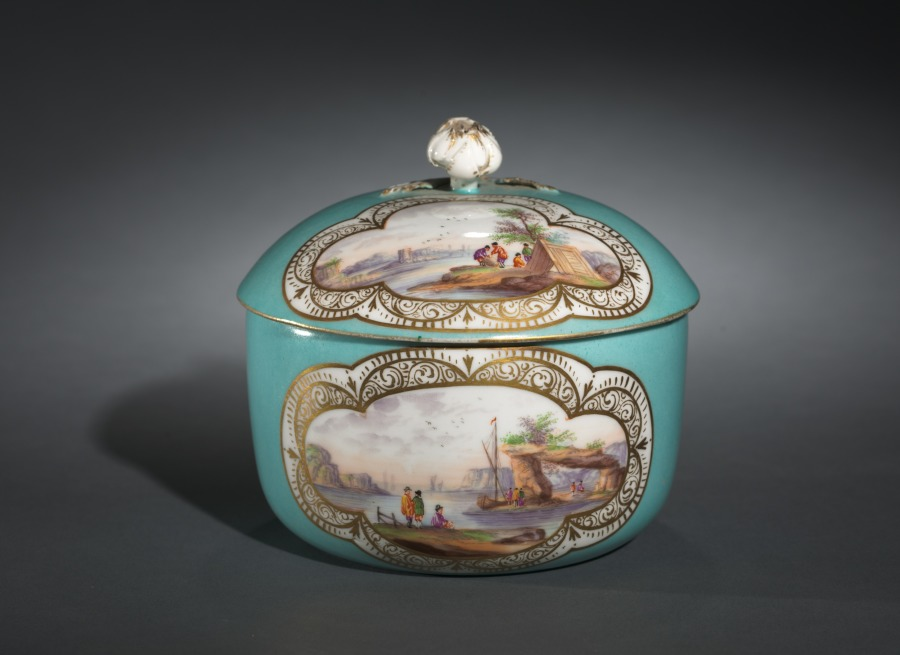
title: Sugar Bowl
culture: Germany, Meissen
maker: Meissen Porcelain Factory (German, est. c. 1710)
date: c. 1750–70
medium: porcelain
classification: Ceramic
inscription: Half moon mark on the bottom.